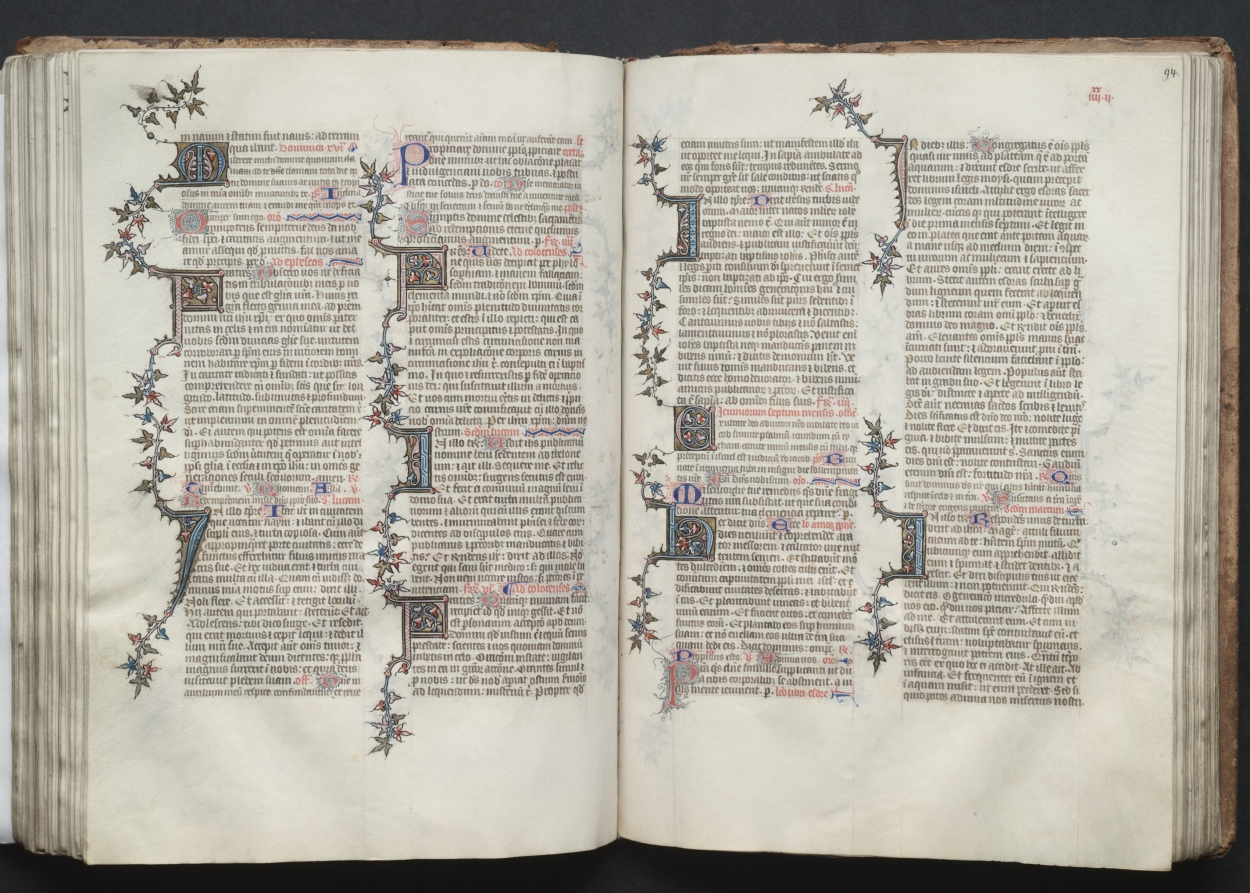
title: The Gotha Missal: Fol. 93v, Text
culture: France, Paris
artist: Master of the Boqueteaux (French)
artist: and Workshop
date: c. 1375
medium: ink, tempera, and gold on vellum; blind-tooled leather binding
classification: Bound Volume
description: The style and quality of this manuscript's decoration is typical of deluxe Parisian books made for aristocratic or royal patrons. Most of the book's decoration appears to be the work of the Master of the Boqueteaux, an artist active at the court of King Charles V (died 1380). His style was apparently shared by a number of book illuminators working in and around Paris. It is very possible that the Gotha Missal belonged to Charles V, but is not provable because the manuscript has no royal portraits and lacks a colophon. Given the book's magnificent decoration, however, it would seem that it was produced for a Valois prince, if not for the king himself. The manuscript receives its name from the German dukes of Gotha, its later owners.